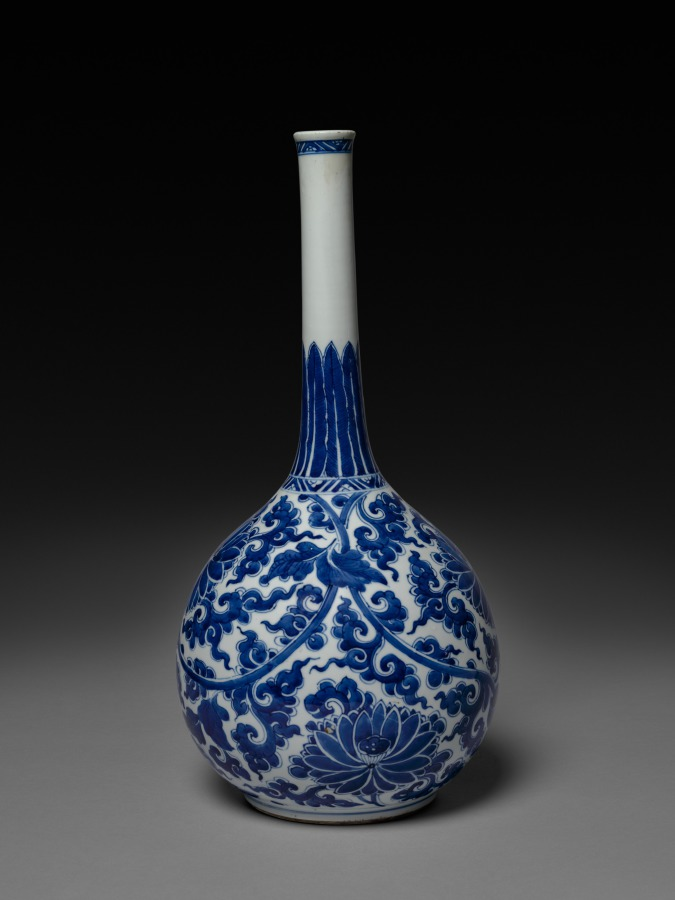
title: Bottle-shaped Vase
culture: China, Qing dynasty (1644-1911), Kangxi reign (1662-1722)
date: 1662–1722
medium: porcelain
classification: Ceramic